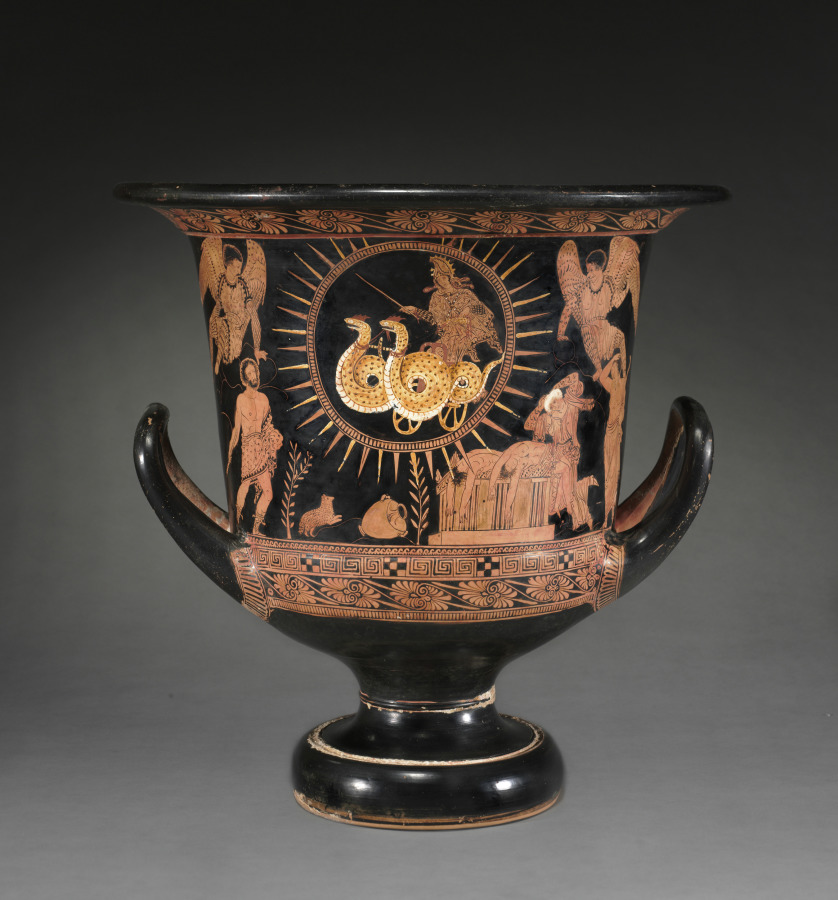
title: Red-Figure Calyx-Krater (Mixing Vessel): Medea in Chariot (A); Telephos with Baby Orestes (B)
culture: South Italian, Lucanian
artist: near the Policoro Painter (South Italian, Lucanian, active c. 400 BCE)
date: c. 400 BCE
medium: ceramic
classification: Ceramic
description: The remarkable scene on the front of this vase relates to the famous tragedy Medea, written by Euripides and first produced in Athens in 431 BC. Framed in the center by a halo (recalling her sun god grandfather Helios), the sorceress Medea flies off in a dragon-drawn chariot. Seeking revenge against her husband Jason, leader of the Argonauts, Medea has just slain their two children. Two Furies flank her, while Jason and a distraught nurse and teacher approach the bodies on the altar below. A different tragedy unfolds on the other side of the vase, from Euripides’s Telephos (438 BC). The wounded warrior Telephos holds the baby Orestes hostage at an altar, with Agamemnon and Clytemnestra rushing to save their son.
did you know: This vase includes scenes connected to two Athenian tragedies dealing with children—Medea and Telephos.